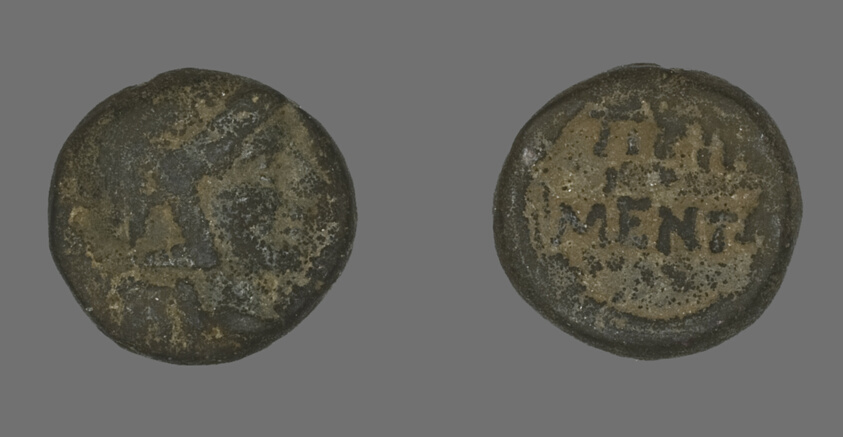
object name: Coin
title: Coin Depicting the Goddess Athena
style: greek, ancient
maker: Greek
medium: Bronze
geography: Ancient Greece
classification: coin; ancient art